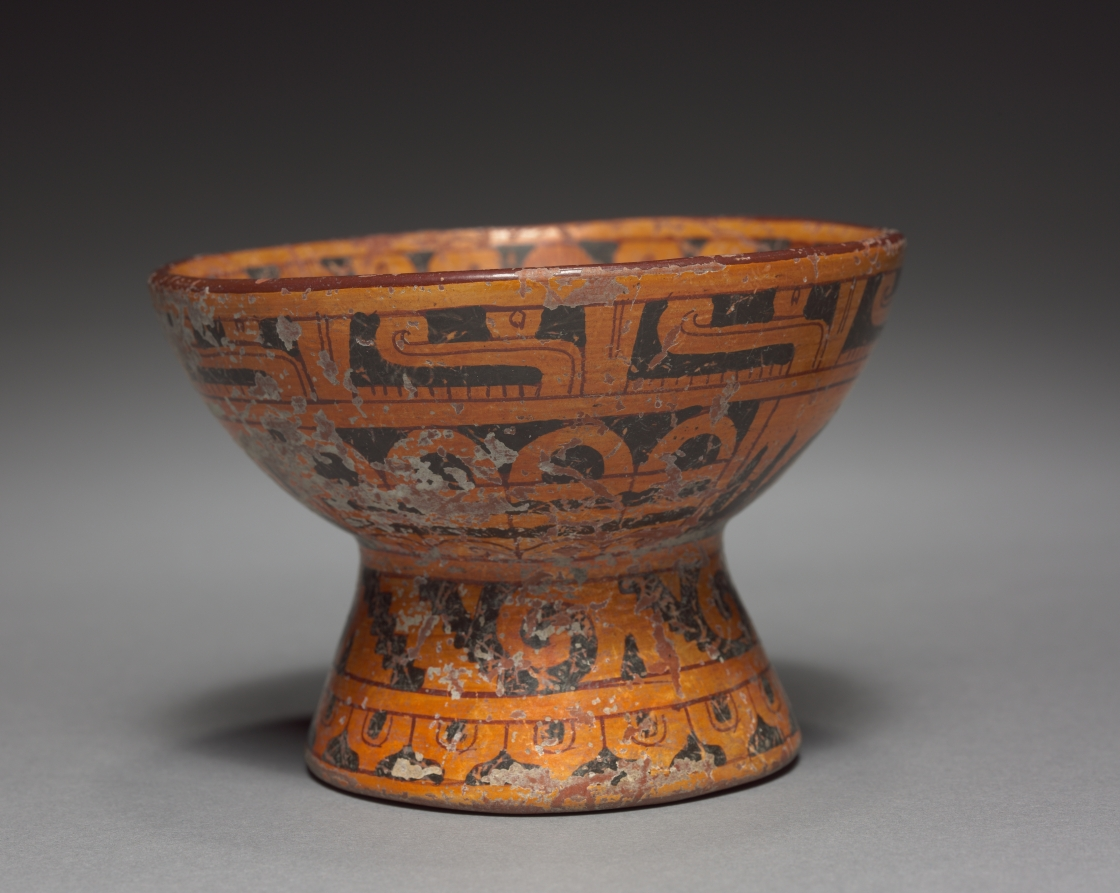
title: Bowl with Rattle Base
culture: Mexico, Cholula?, Mixteca-Puebla Style, 10th-16th century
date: c. 900–1519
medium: earthenware with colored slips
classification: Ceramic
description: The nobility may have used these goblets for a chocolate beverage or for pulque, made from the fermented sap of the maguey cactus. Both are painted with the precision and brilliant colors for which the Mixteca-Puebla style is renowned, and they carry some of the same motifs, such as the band of stylized animal heads at the top. The smaller bowl has a rattle base.